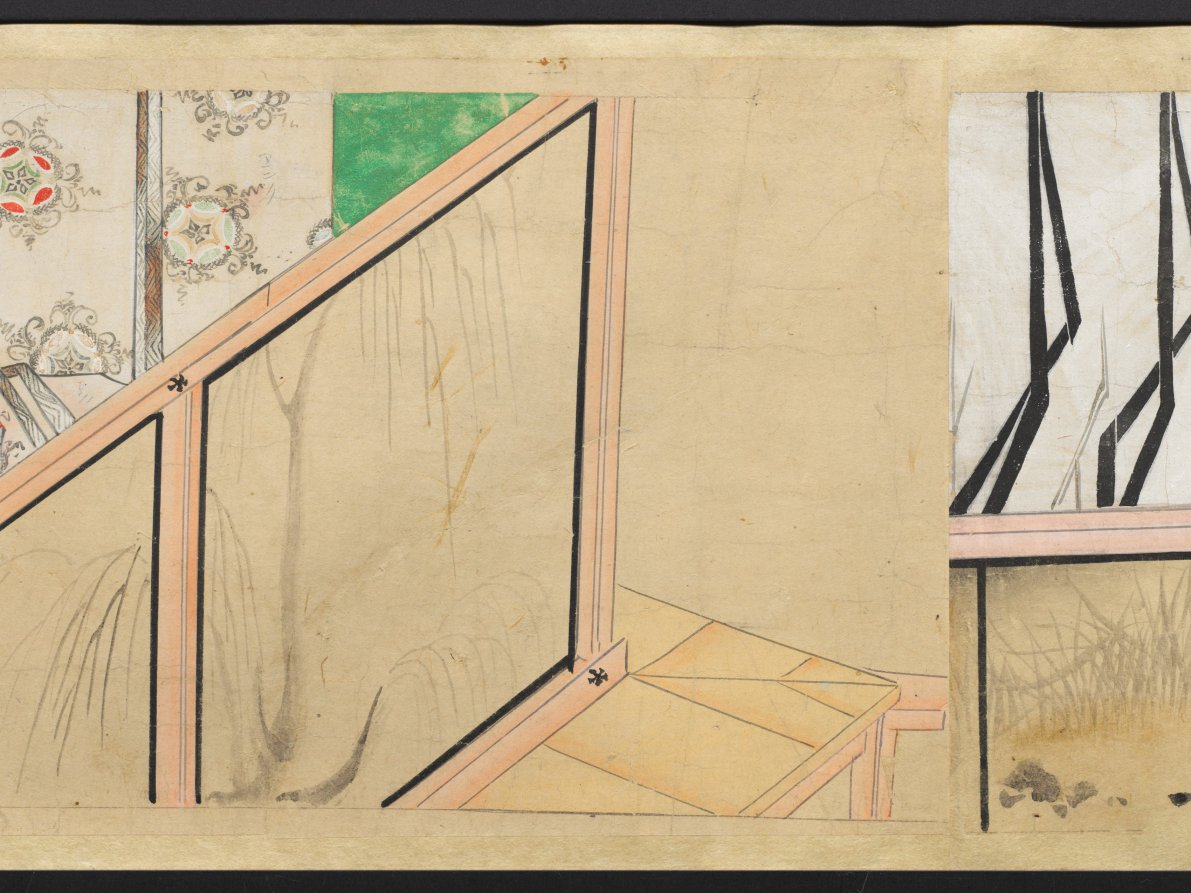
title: The Saltmaker's Story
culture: Japan, Edo period (1615–1868)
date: early 1600s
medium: One of a pair of handscrolls; ink, color, and gold on paper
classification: Painting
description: Once read and copied by girls at New Year’s celebrations and included in dowries, The Saltmaker’s Story is a rags-to-riches tale in which daughters are gifts from the gods. Despite his simple outlook, the main character progresses from humble roots as an associate at Kashima Shrine to the elite status of grandfather of the emperor through the intervention of the Kashima deity. The Saltmaker’s Story is traditionally presented in a set of three scrolls, but the text of this set has been removed by a previous owner, who remounted the illustrations as a pair. The paintings of this one take us from right to left through the second half of the tale.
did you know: This handscroll originally had texts before its paintings, but the texts were removed.